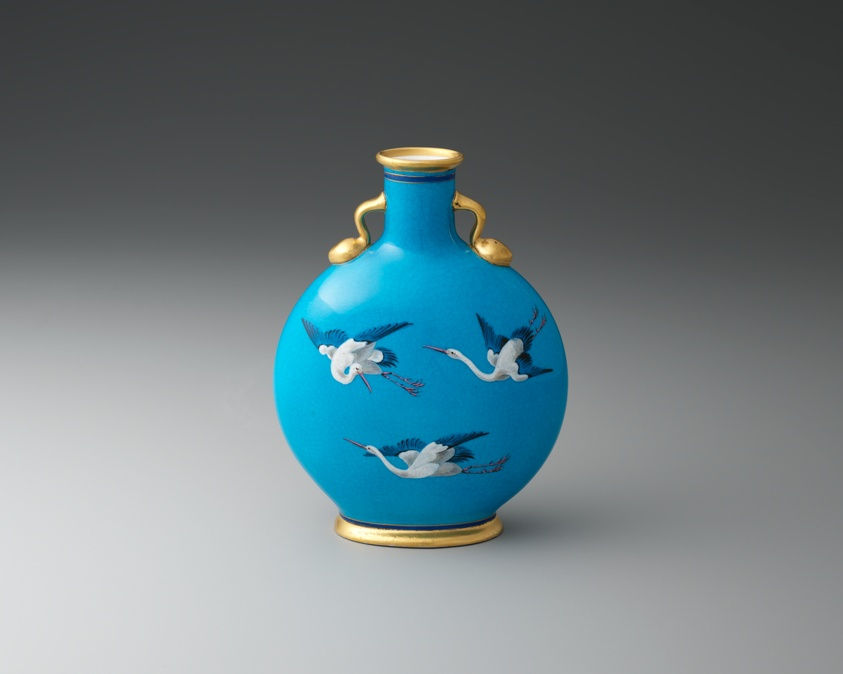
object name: Ceramics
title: Moon Flask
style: Japanism, 19th century, Aesthetic Movement, Aestheticism, english, japonism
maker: Minton (Stoke-on-Trent, England, founded 1793)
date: c. 1875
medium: Bone china, enamel, and gilding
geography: Stoke-on-Trent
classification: ceramics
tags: vase, moon